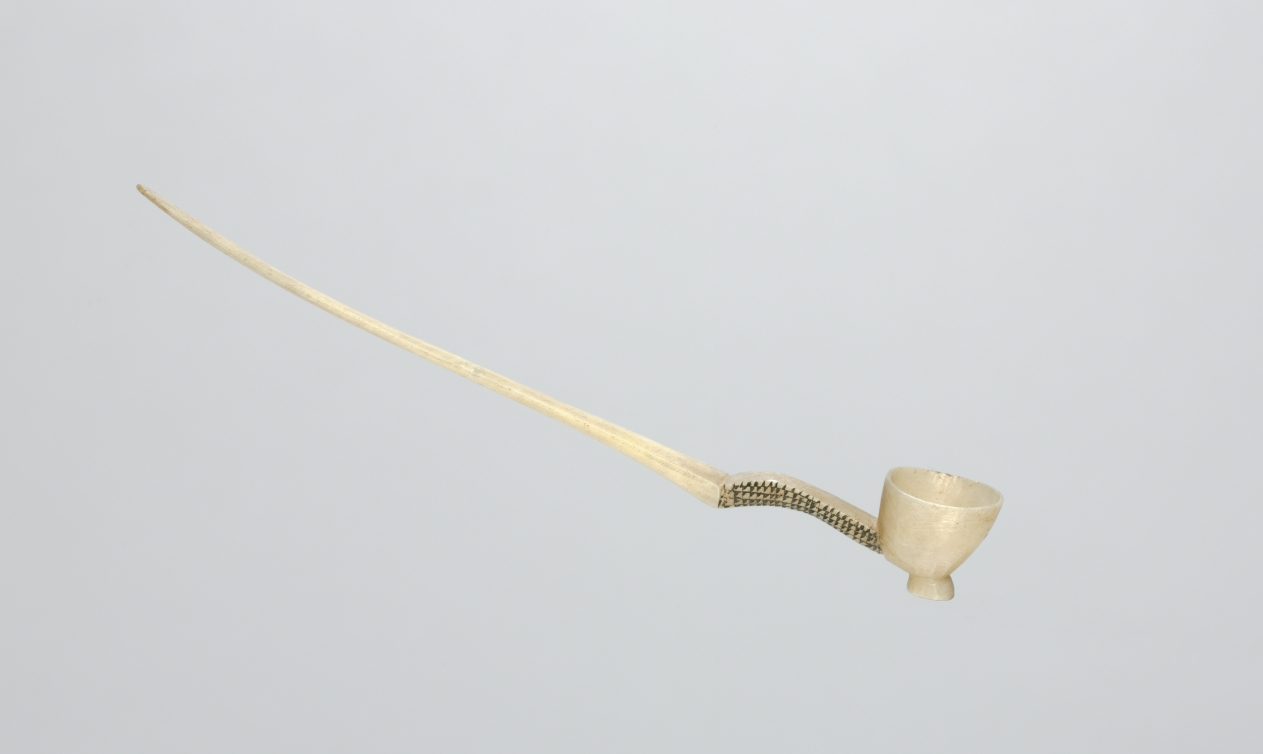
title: Snuff Spoon (intshengula or izintshengula)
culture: Africa, Southern Africa, South Africa, Zulu-style maker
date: late 1800s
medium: bone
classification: Implements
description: Often, snuff spoons made from the rib of an ox or cow were subtly carved to suggest a female body. Decorated with incised designs blackened with cattle fat and ash, many are true hybrid objects, combining a spoon with a long-tined comb or hairpin. Such spoons were typically worn as ornaments in the hair or even the beard, thus signaling the social standing of their wearer.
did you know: Such spoons were typically worn as ornaments in the hair or even the beard, signaling the social standing of their wearer.